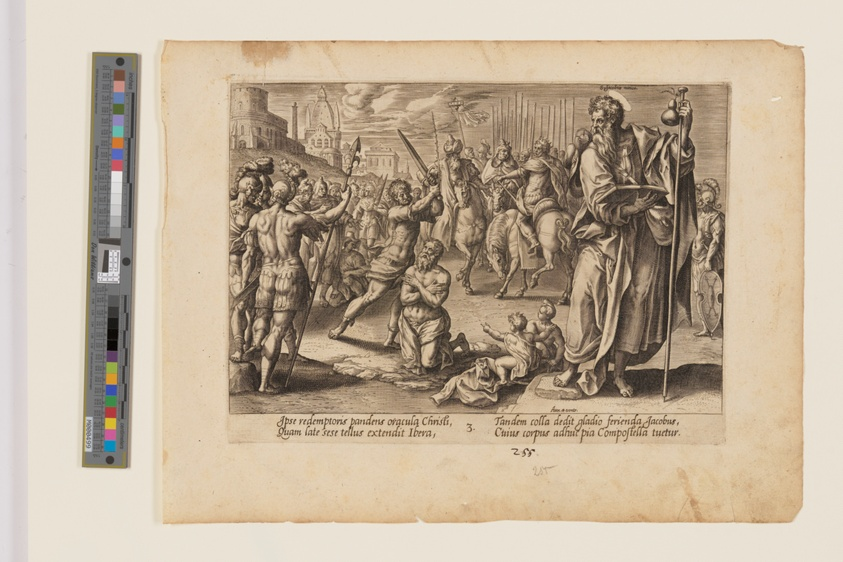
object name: Print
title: The Martyrdom of St James Major, from The Martyrdom of Christ and the Apostles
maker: Hendrick Goltzius (Dutch, 1558–1617); after Maarten de Vos (Flemish, 1532–1603); published Hieronymus Cock (Netherlandish, c. 1510–1570)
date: c. 1578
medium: Engraving on ivory laid paper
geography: Netherlands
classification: engraving; paper; print; prints and drawing